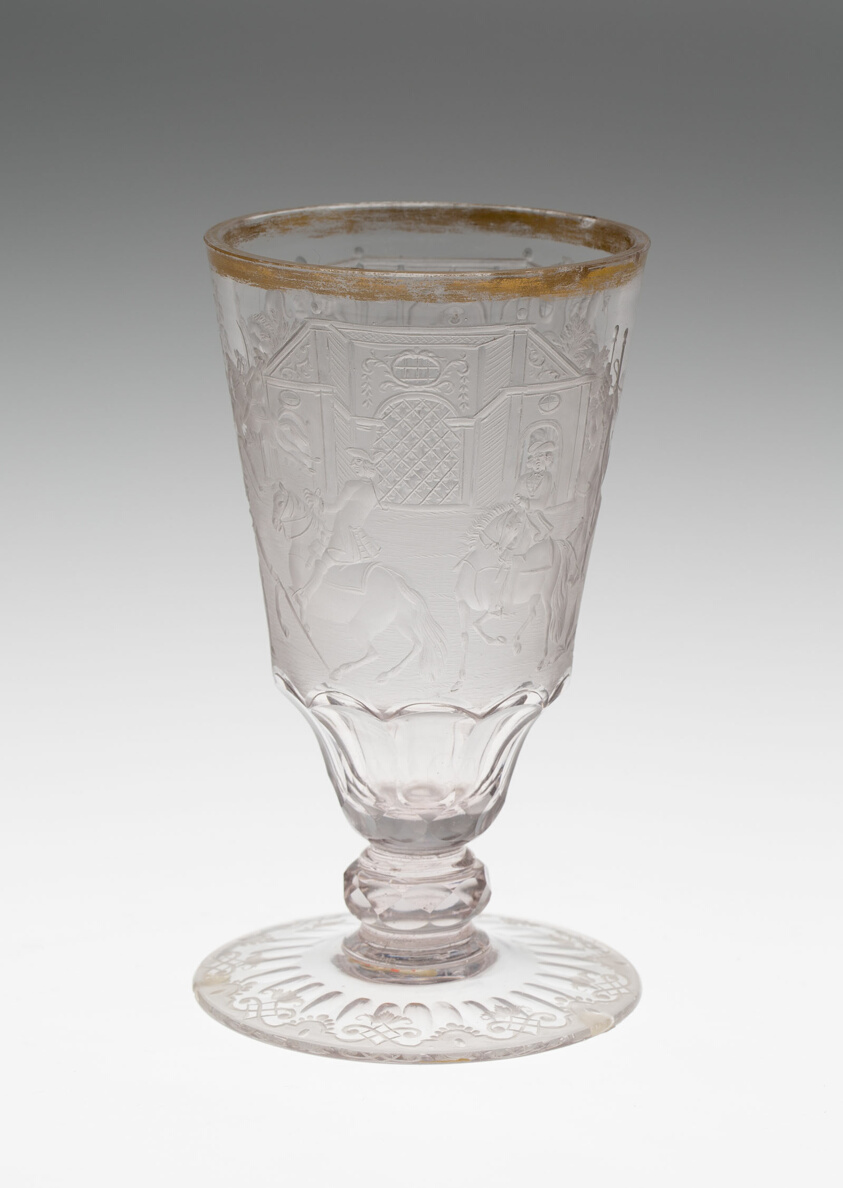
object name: Glass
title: Wine Glass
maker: Germany, Schleswig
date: c. 1740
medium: Glass; engraved and gilt decoration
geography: Schleswig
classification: drinking vessel; glass; european decorative arts